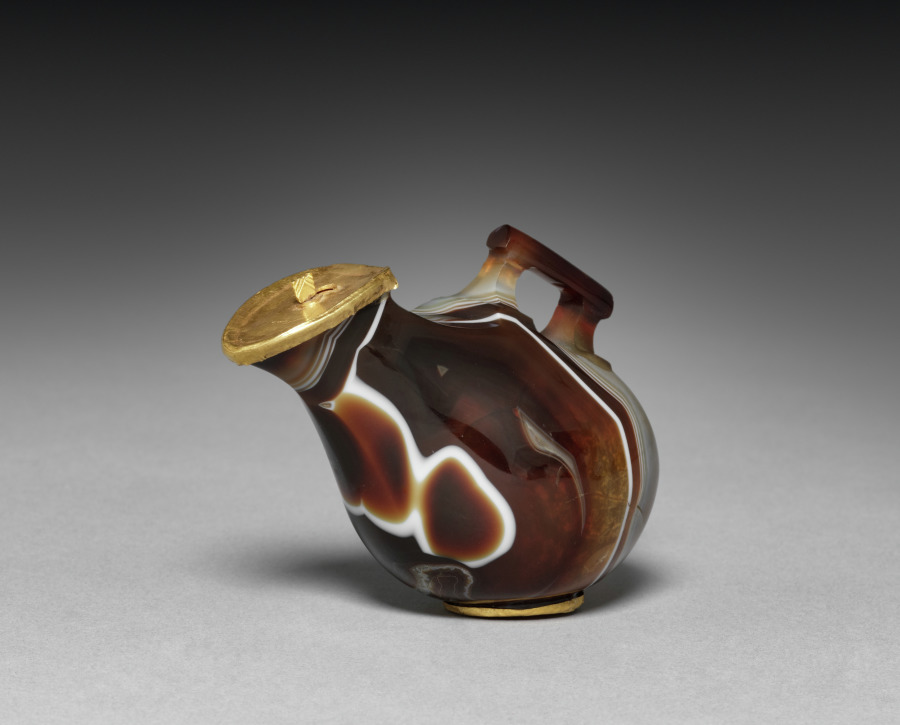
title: Askos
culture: Greece, Ptolemaic Dynasty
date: 200–1 BCE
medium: agate and gold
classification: Cosmetic Objects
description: This miniature vessel was carved from a single piece of banded agate, polished to a shine, and embellished with a gold lid and gold details on the base. Inside the ring of gold at the base is a trio of gold papyrus stalks, a likely reference to Egypt. In shape, it resembles an ancient wineskin, or askos, though its small size suggests use for luxury perfumes or oils. A tiny crab, likely once inlaid with a precious material, has been carved behind the handle.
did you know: The knob on the lid connects to a hidden disk to control the flow of liquid.